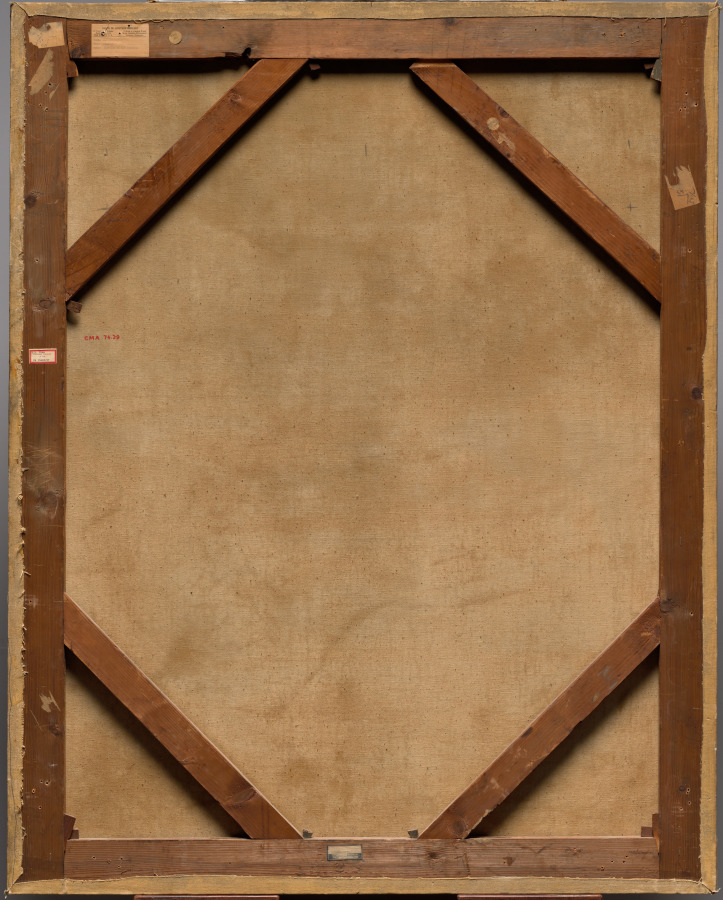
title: Interior of the Pantheon, Rome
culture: Italy, 18th century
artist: Giovanni Paolo Panini (Italian, 1691–1765)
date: 1747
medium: oil on canvas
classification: Painting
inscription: Signed lower left: "ROMAE / [I] P. PANINI. 1747."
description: Created as a temple under the Roman emperor Hadrian around the year AD 125, the Pantheon became a Christian church in 609. Significant restoration took place in the early 1700s, a period of renewed attention to early Christian monuments. The site was a major monument of antiquity, an active church, and its portico, visible through the door, held the most important art fair in the city. Panini shows the complexity of this public space by representing foreign tourists, local churchgoers, Roman nobles, and artists mingling under the dome.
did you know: Panini's depictions of contemporary and ancient Rome were popular with foreigners who visited the city on their Grand Tours.